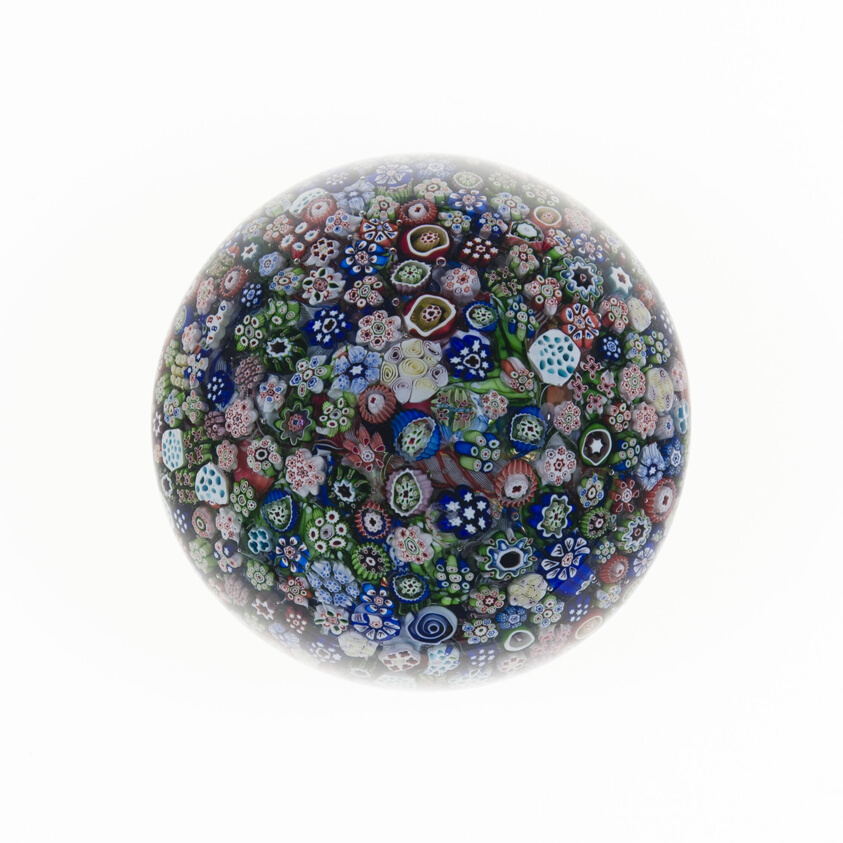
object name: Glass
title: Paperweight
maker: Baccarat Glassworks (Cristalleries de Baccarat); Lorraine, France, founded 1764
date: 1846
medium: Glass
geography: France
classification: paperweight; glass